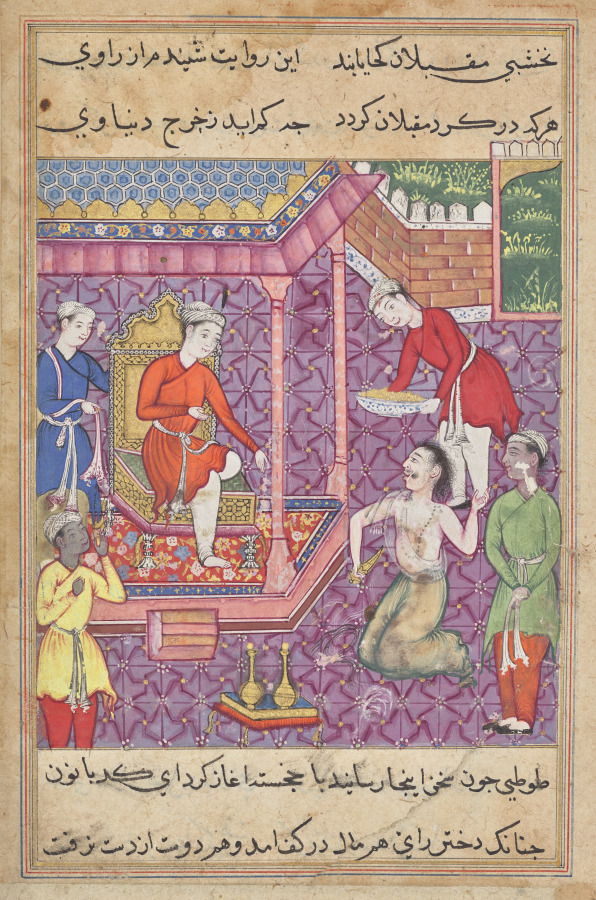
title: The magician disguised as a Brahman returns to claim his “daughter-in-law,” from a Tuti-nama (Tales of a Parrot): Thirty-fifth Night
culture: Mughal India, court of Akbar (reigned 1556–1605)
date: c. 1560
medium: gum tempera, ink, and gold on paper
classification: Painting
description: The story continues with a ruse to allow the Brahman and the princess to escape the king’s son and live happily ever after. The magician transformed the lovers into men, so they were able to leave the palace unrecognized. In order to garner a fortune on which they could support themselves, the magician approached the king in the guise of a Brahman to reclaim the woman he had entrusted to the harem and who he said was his daughter-in-law. When the king stated that she has disappeared, the magician in the form of a Brahman acted as though he would stab himself to death. The king assuaged him by paying a large sum of money as compensation for losing the woman. A servant brings a blue-and-white porcelain dish full of gold coins. A different artist painted this page without referencing the appearance of either the king or the magician in the guise of a Brahman from the previous page.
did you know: The previous painting, which shows the palace's reaction to the daughter-in-law’s disappearance, is currently in a private collection.